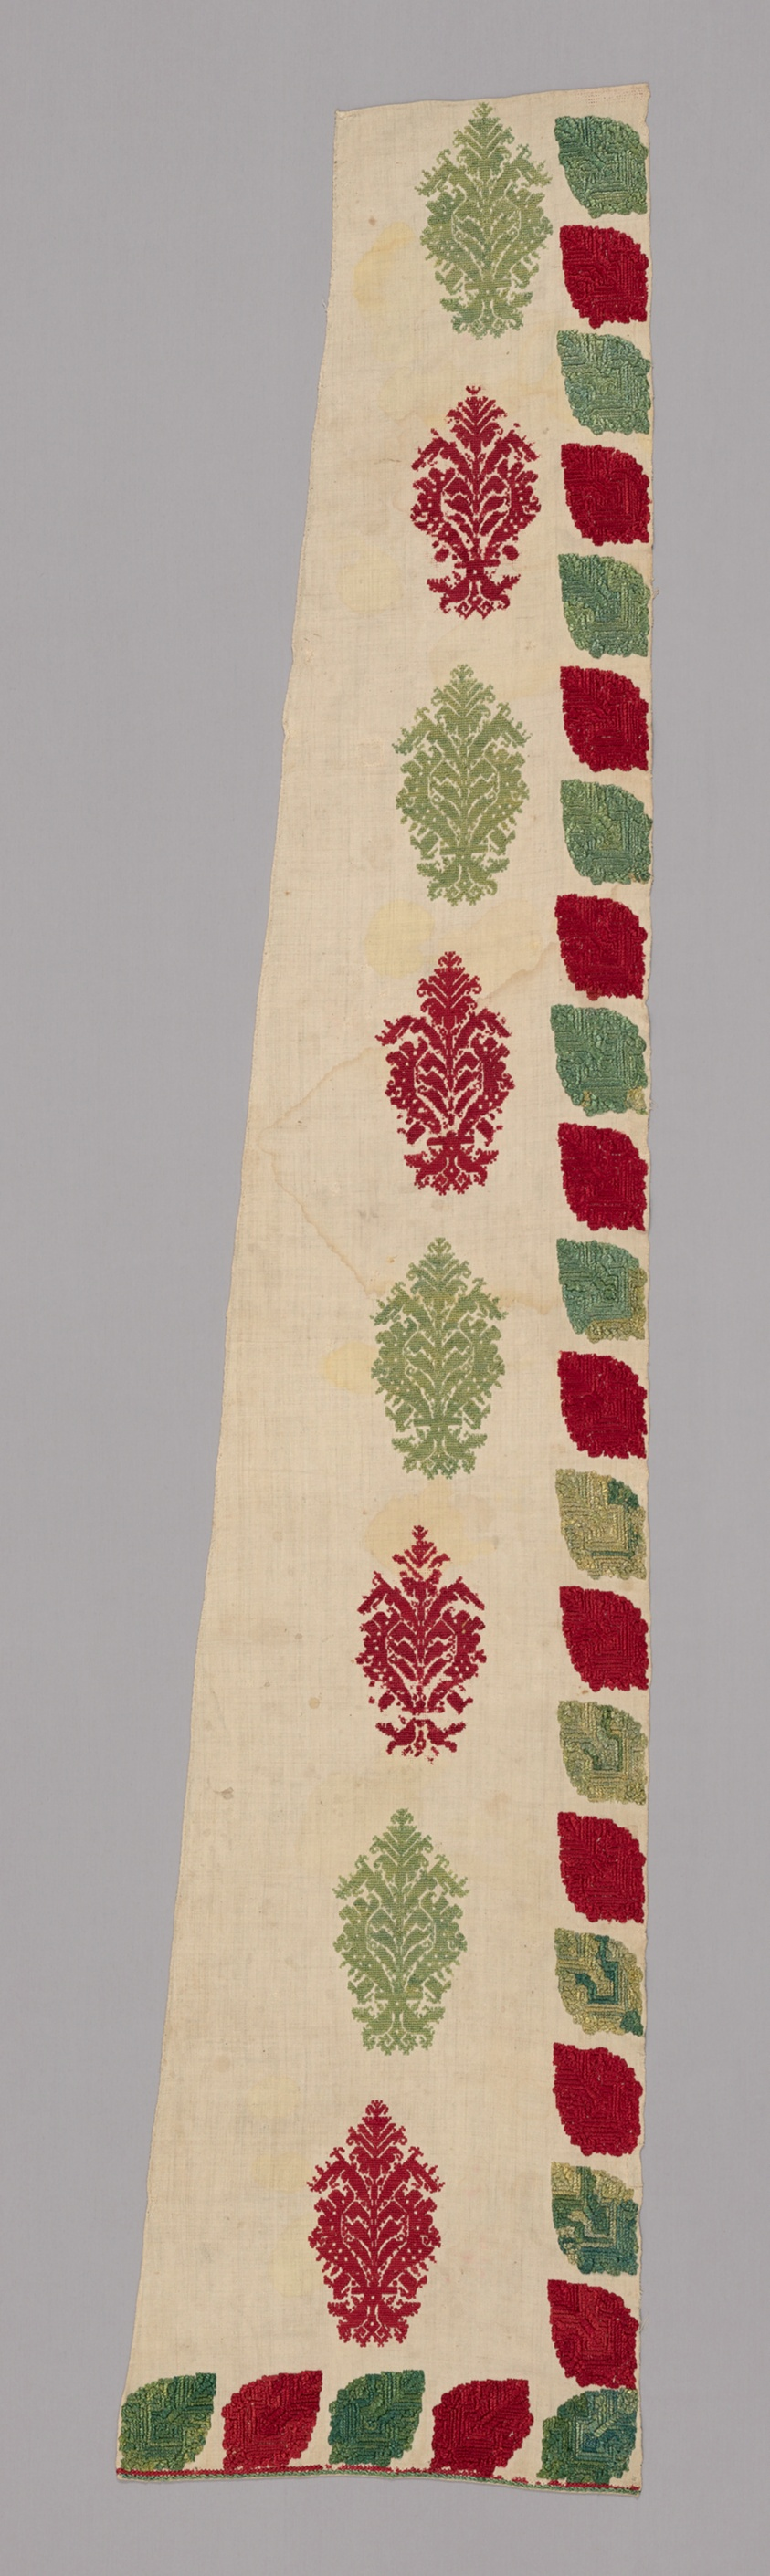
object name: Textile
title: Panel (From a Bed Tent)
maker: Greece, Dodecanese Islands, Rhodes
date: 1700/1900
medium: Linen, plain weave; embroidered with silk in cross and feather stitches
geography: Greece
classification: textile; needlework (visual works)